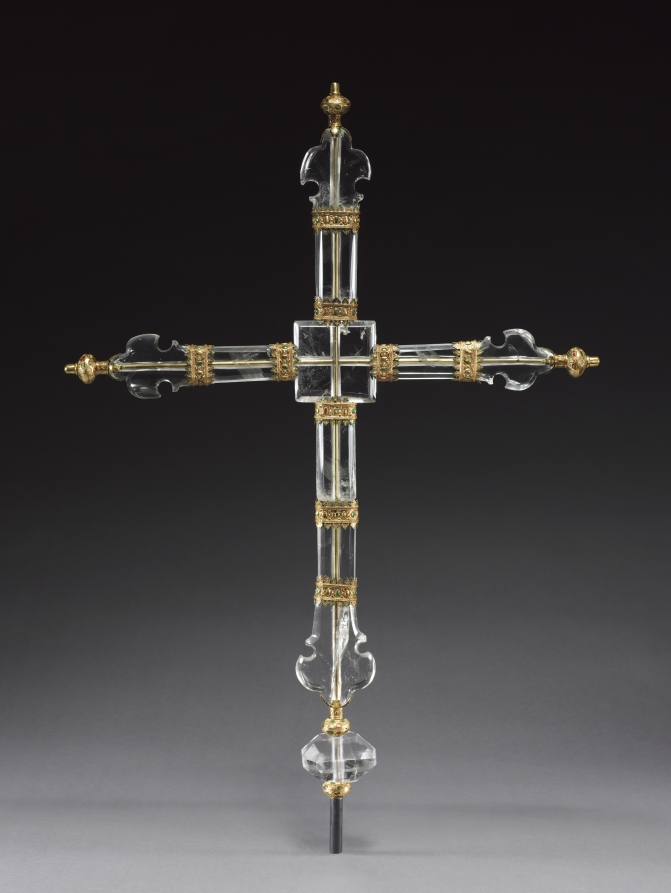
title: Cross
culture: Italy, Venice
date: c. 1280–1300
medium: rock crystal, painted gold mounts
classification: Stone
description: This cross consists of rock crystal pieces drilled through their centers and fastened together with a golden rod. Where they join, the pieces of crystal are bound with decorative bands of painted gold. Venice was one of the most important centers of rock crystal cutting at the end of the 1200s. The cross was undoubtedly intended for prominent display on an altar and may have also been used in liturgical processions. The cross was at one time in the Royal Treasury of Saxony and purportedly first belonged to Rudolph I of Habsburg (reigned 1273–91).